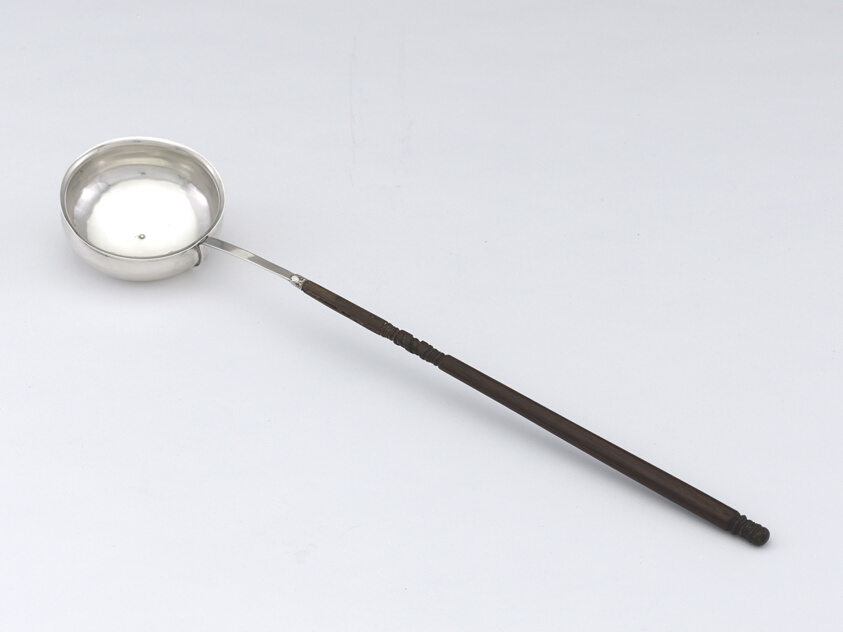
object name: Metalwork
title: Ladle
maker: Ephraim Brasher (American, 1744–1810)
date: 1765–75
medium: Silver and mahogany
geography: United States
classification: ladle; silver; utensil for serving food; utensil; american decorative arts; american arts; decorative arts